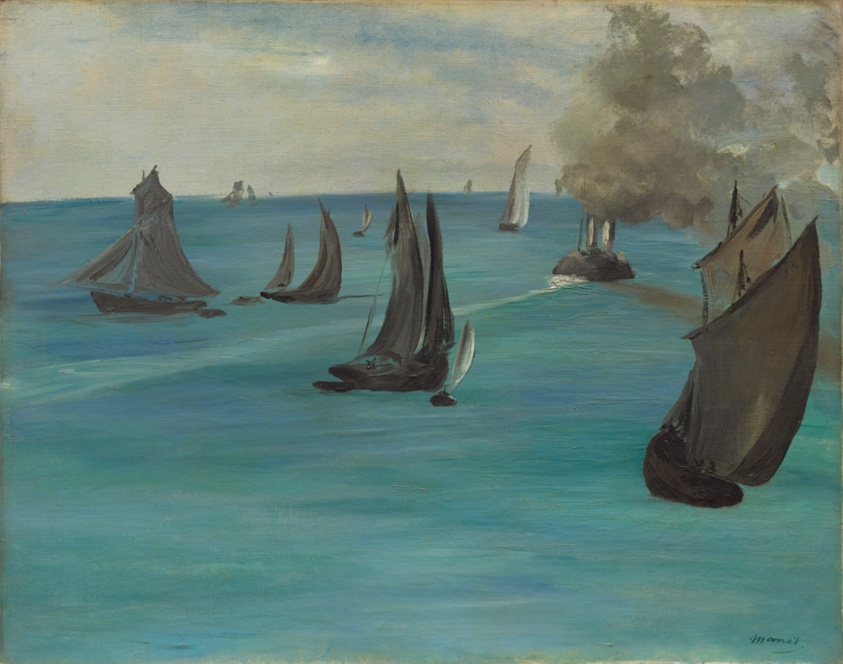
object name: Painting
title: Sea View, Calm Weather (Vue de mer, temps calme)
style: Impressionism, 19th century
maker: Édouard Manet (French, 1832–1883)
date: 1864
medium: Oil on canvas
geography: France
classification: painting; oil on canvas; french; paint; european painting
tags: weather/seasons, boats, horizon, sailing, sea, sky, water, transportation, landscapes